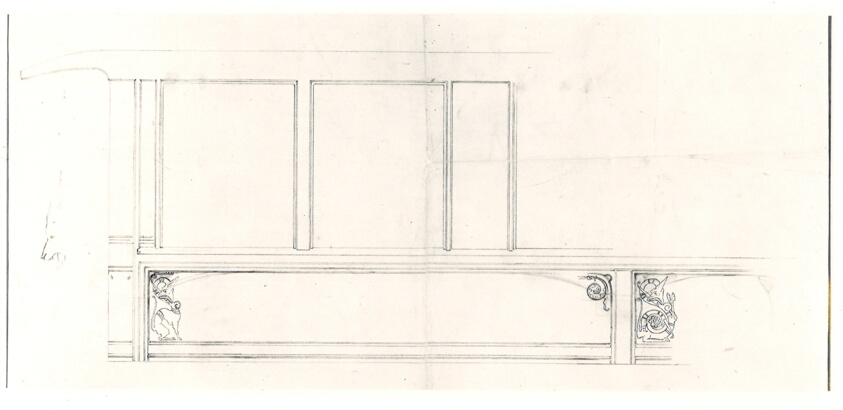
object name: Architectural Drawing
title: Pullman Car Interior Elevation Sketch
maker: Solon Spencer Beman (American, 1853-1914)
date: c. 1892/94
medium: Graphite on tracing paper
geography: United States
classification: architectural drawing; design drawing; architectural detail; architecture